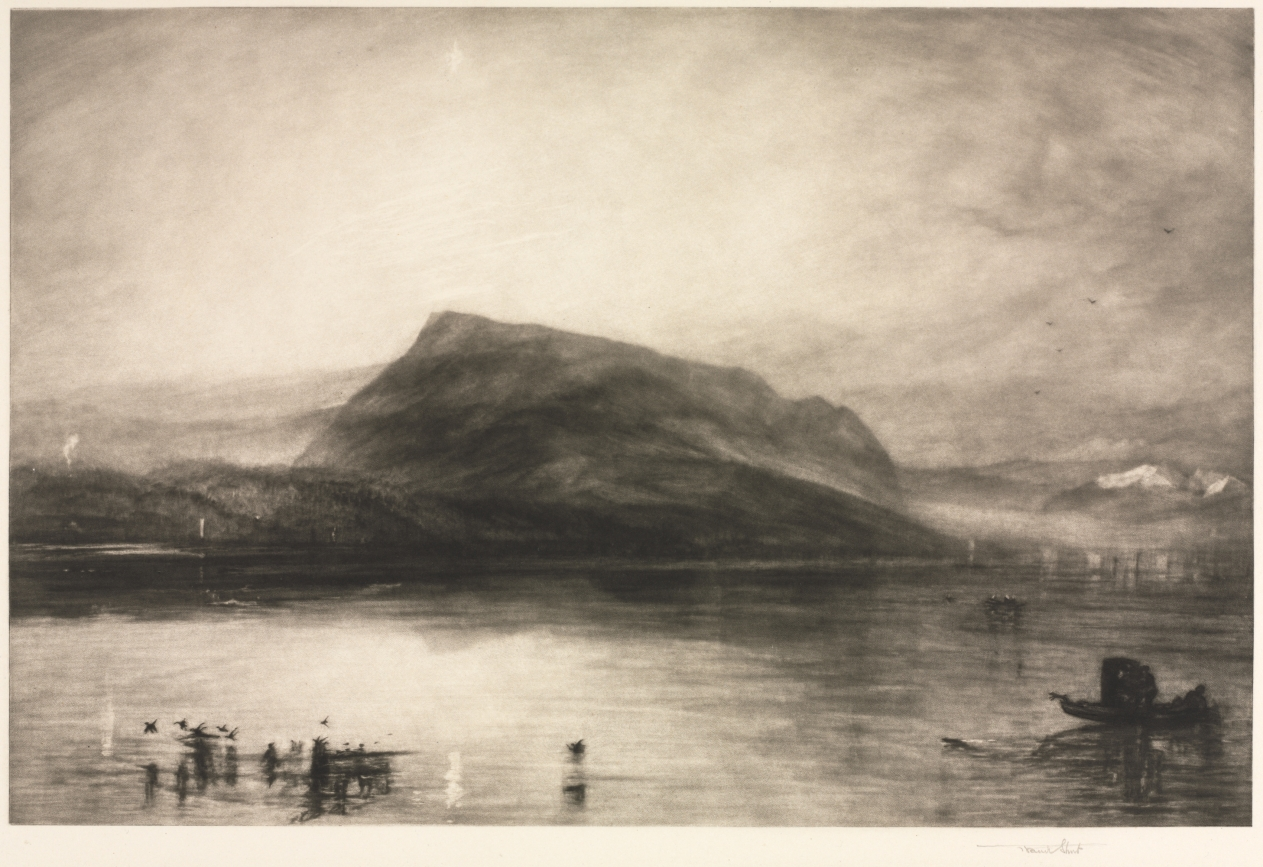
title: Mt. Rigi at Dawn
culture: England, 20th century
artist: Frank Short (British, 1857–1945)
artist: after Joseph Mallord William Turner (British, 1775–1851)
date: 1910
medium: mezzotint on chine collé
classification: Print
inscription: Lower right, in pencil: "Frank Short" Bottom left of mount page, in pencil: "Mt. Righi at Dawn"